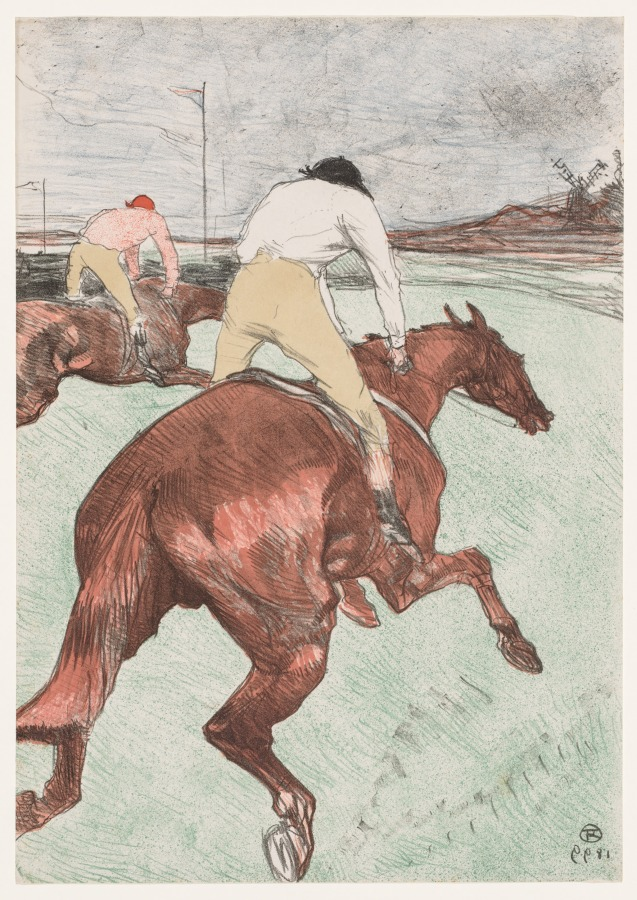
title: The Jockey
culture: France, late 19th Century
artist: Henri de Toulouse-Lautrec (French, 1864–1901)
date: 1899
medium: color lithograph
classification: Print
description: Motivated by the popularity of the races, Henri de Toulouse-Lautrec executed this lithograph both in color, seen here, and in black and white. He intended to publish the color version in a portfolio of horse-racing subjects, but the project never came to fruition and Jockey was published alone. The artist's admiration for Edgar Degas's horse-racing pictures is clear in Jockey, and he shared Degas's appreciation of Japanese ukiyo-e woodblock prints. Particular elements of the lithograph reveal the influence of the Japanese woodcut: the overall flatness; the daring cropping—particularly of the background horse whose head and hindquarters have been omitted; the pale green hue of the grass and the blue-violet sky; and the dramatic, rushing perspective of the horses galloping into the distance. However, the younger artist incorporated the Japanese aesthetic into his own visual language in an entirely original way. Unlike Degas, Toulouse-Lautrec ignored Eadweard Muybridge's photographs and depicted his horse and rider in the physically impossible "flying-gallop" position.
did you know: Henri de Toulouse-Lautrec set this print at an identifiable race track, at Longchamps in Paris's Bois de Boulougne.